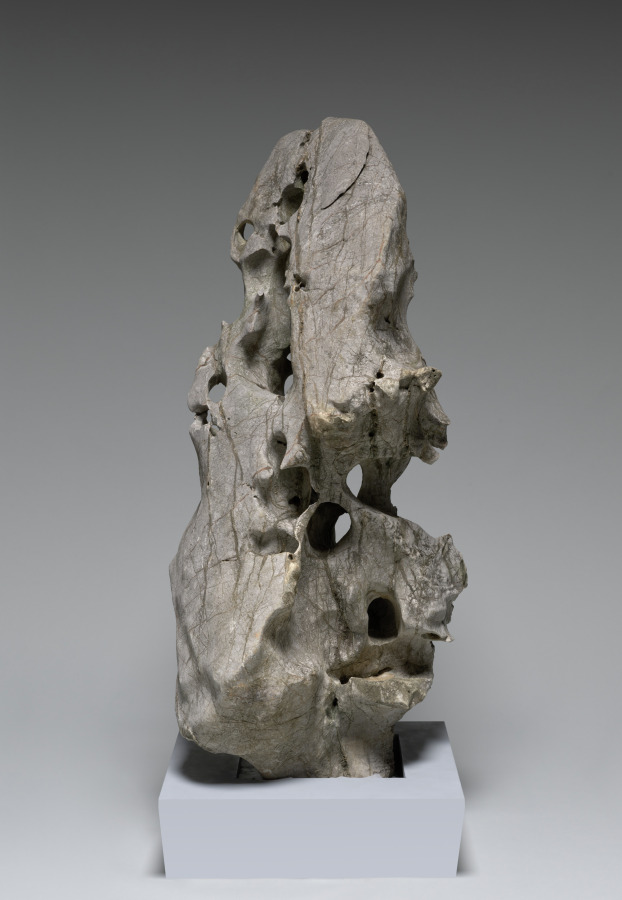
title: Taihu Garden Stone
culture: China, Jiangsu province, Wuxi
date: 0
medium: Limestone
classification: Stone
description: In China, rocks are considered elements of nature that possess spirit and life energy. With its upward winding masses, perforations, weathered surface, and multiple viewpoints, the stone exhibits sculptural qualities and embodies constant transformation through natural forces and human intervention. A solid piece of rock, it was originally sourced from the Lake Tai region. Stones were collected, set up in gardens, or installed on scholar’s desks as miniature mountains. Traditionally, Taihu stones were the most desirable type of rock. This stone is a gift by the contemporary artist Liu Dan, known for his depictions of rocks, who calls them "the stem cells of Chinese landscape."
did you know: The donor, Liu Dan, is the most prominent and celebrated painter of rocks in contemporary China.